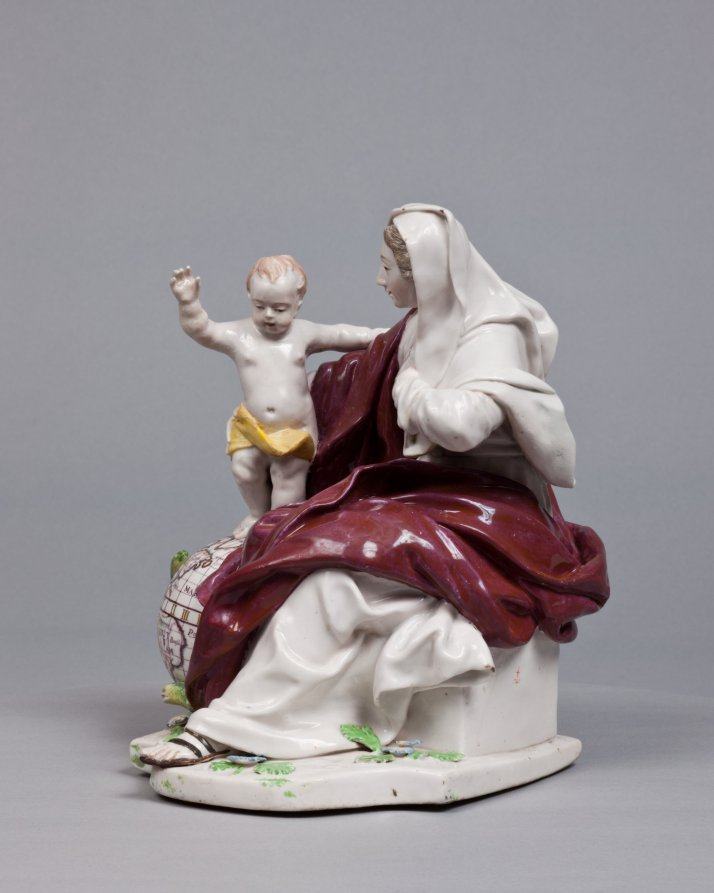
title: Madonna and Child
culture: England, Chelsea, 18th century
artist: Chelsea Porcelain Factory (Britain, London, 1745–84)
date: c. 1755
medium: porcelain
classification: Ceramic